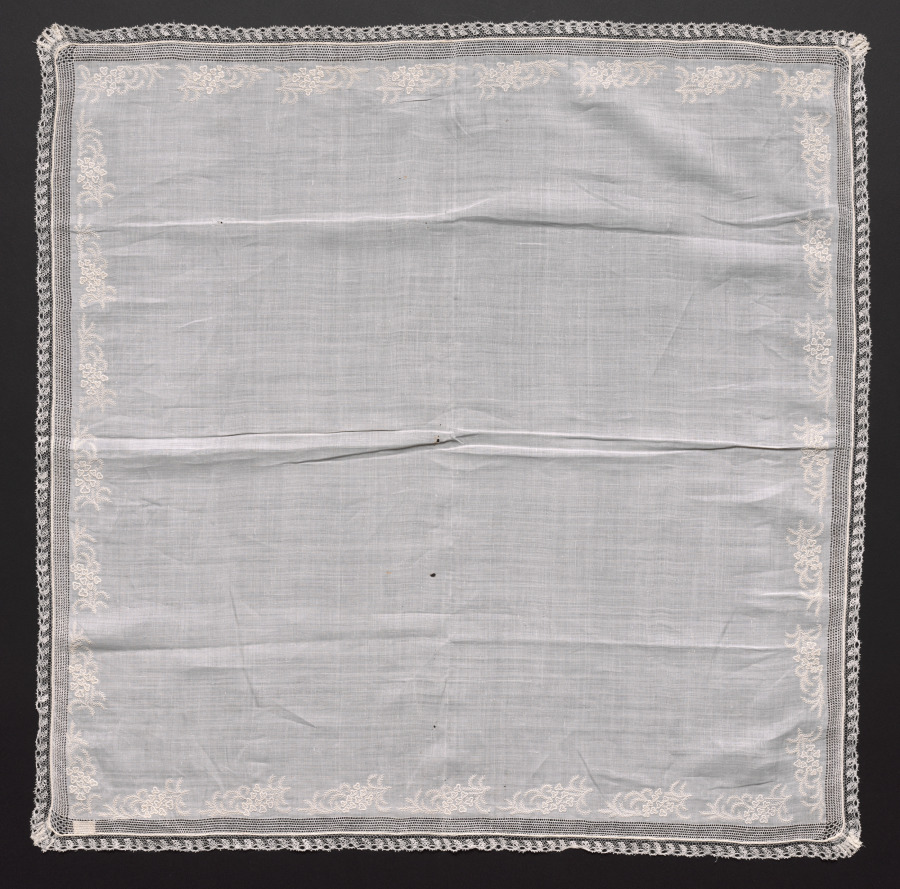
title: Lace Handkerchief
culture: France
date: 1800–1820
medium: Plain weave linen ground: needle lace (drawnwork) border, bobbin lace edging, and embroidery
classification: Embroidery